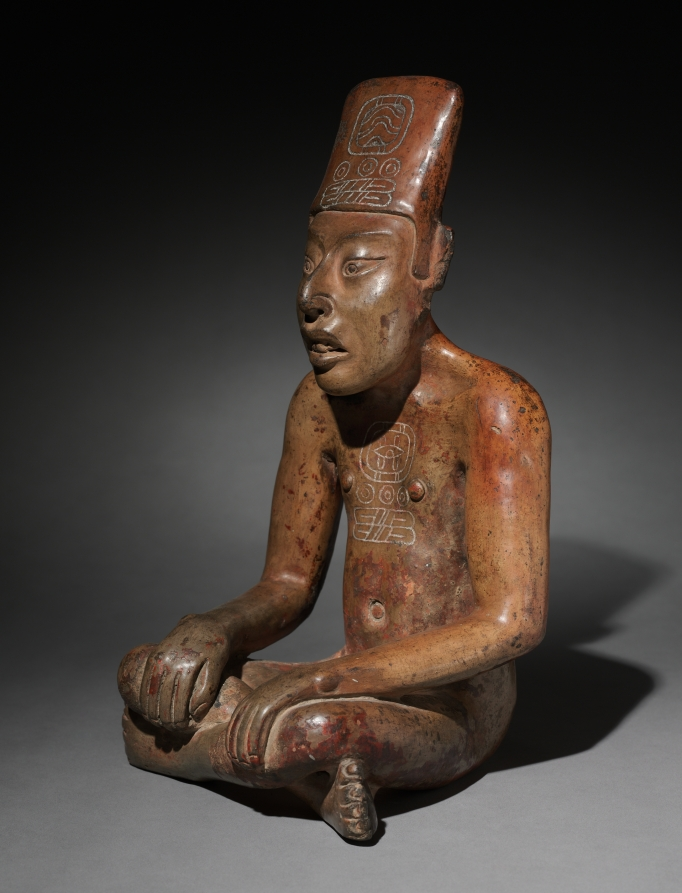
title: Seated Figure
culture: Mexico, Oaxaca, Zapotec style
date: 300 BCE–700 CE (thermoluminescence date, 285 BCE–515 CE)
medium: ceramic, slip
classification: Sculpture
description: The most famous Zapotec tomb ceramics are elaborate figural urns flanked by smaller, simpler companions similar to this one. Like other companions, this example probably belonged to a set of nearly identical figures; two others remain in Mexico. The identity of ceramic tomb figures-whether elite humans, royal ancestors, or deities-is still debated. The Zapotec developed one of Mesoamerica’s earliest writing systems, evidenced by the hieroglyphs on the headdress and chest. These are the names of calendar days, "13 Water" and "13 Flint Knife," respectively. Because people were named after the day on which they were born, one hieroglyph may identify the figure.